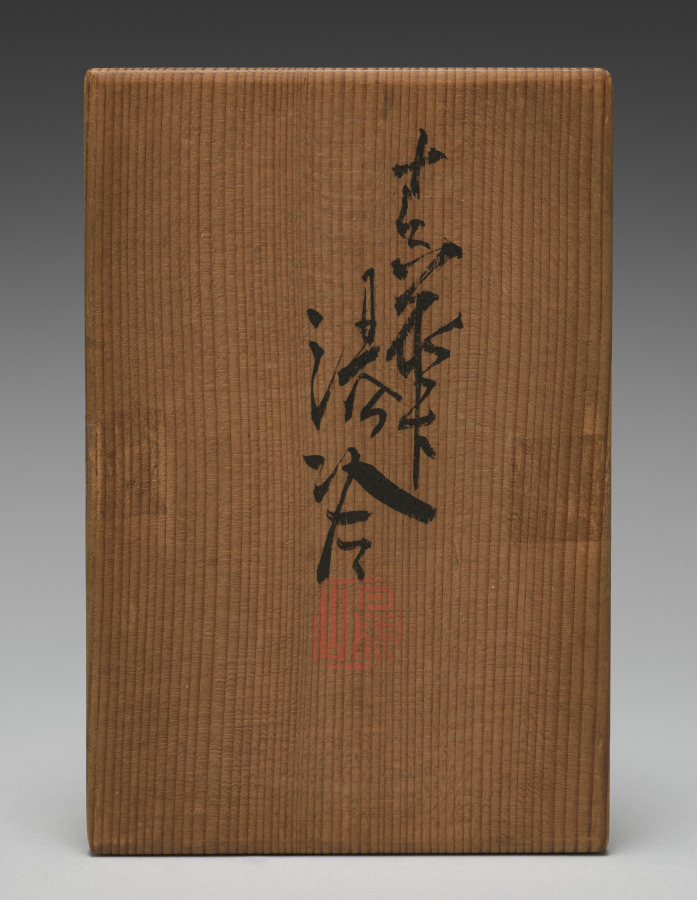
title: Water Cooler with Pines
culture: Japan, Meiji period (1868–1912)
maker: Seifū Yohei III (Japanese, 1851–1914)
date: 1893–1914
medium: Porcelain with underglaze blue and molded designs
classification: Ceramic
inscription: The center of the base contains an ovoid “Seifu” seal.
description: Hot water coolers, or yuzamashi, are essential components of sencha tea sets. Yuzamashi are used to cool boiled water to the ideal temperature for the type of tea to be brewed. The kidney-like shape of this one permits it to be cradled in one hand, following curvature of the palm, with the tips of the thumb and index finger each pressed against a nyoi staff-head-shaped applied form, perfectly placed to ensure a stable hold. Someone pinching the cooler in this way would have enough protection from the heat to maintain a steady grip but also sufficient contact along the base of thumb to assess the water temperature. On each of the cooler’s two longer sides, a pine tree in grass or sand is painted under the glaze in cobalt blue. The tree on one side has two main roots and two large branches, while that on the other has a single, thick, curved line from root to tip with racks of needles spreading across the width of the sky. A blue oval is traced along the footring, and the center of the base contains an ovoid “Seifu” seal.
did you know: Evergreen, pines have associations with eternal youth and longevity.